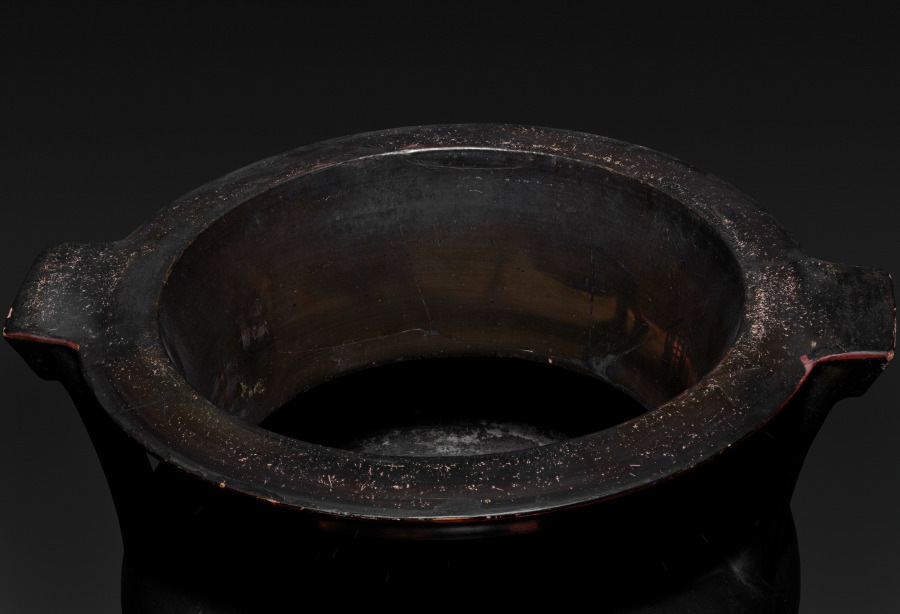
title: Red-Figure Column Krater (Mixing Vessel): Komos (Revel)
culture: Greek, Attic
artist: attributed to Pig Painter (Greek, Attic, active c. 480–460 BCE)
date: 470–460 BCE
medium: ceramic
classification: Ceramic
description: Used for mixing wine and water at a symposium (or drinking party), this column-krater speaks to the perils and pleasures of drinking. On one side, a bearded man holding a staff and a drinking cup leans forward, a red stream of vomit falling from his mouth. Before him is a nude young boy, holding a tortoiseshell lyre and a basket or pail. On the other side, a young man dances, holding a deep cup and wearing just one boot. On the neck above him, scratched in large letters, is the name SIMONOS, probably indicating that the vase once belonged to someone named Simon.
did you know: The bearded man on this vase is vomiting—perhaps a humorous warning against over imbibing.